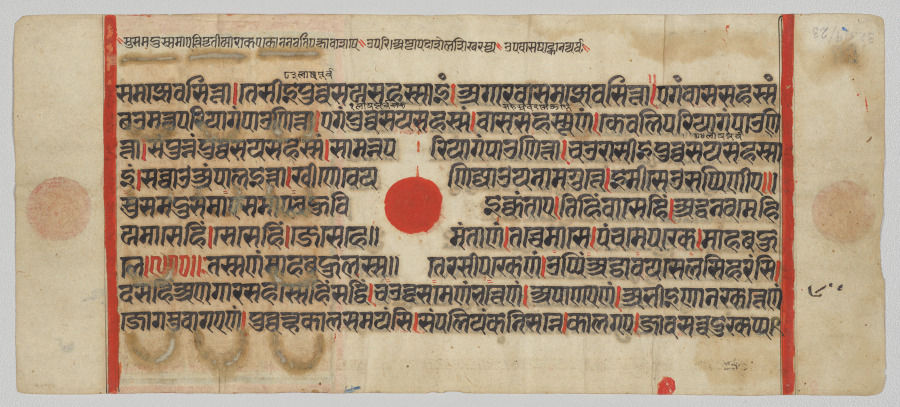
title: Text, Folio 57 (recto), from a Kalpa-sutra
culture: Western India, Gujarat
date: c. 1475–1500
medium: Gum tempera, ink, and gold on paper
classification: Painting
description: The founder of Jainism, Mahavira, had 11 main disciples, all depicted as identical to one another. They all sit in a meditative posture, with the left hand in the lap, while the right hand is in the gesture of teaching. They each have shaven heads, elongated earlobes, and white robes, indicating that this manuscript was used by the Shvetambara (White Clad) sect. In the upper central grid, decorated with flowers, is a stylized om-hrim, mystic syllables visually combined to invoke the essence of all Jain teaching.